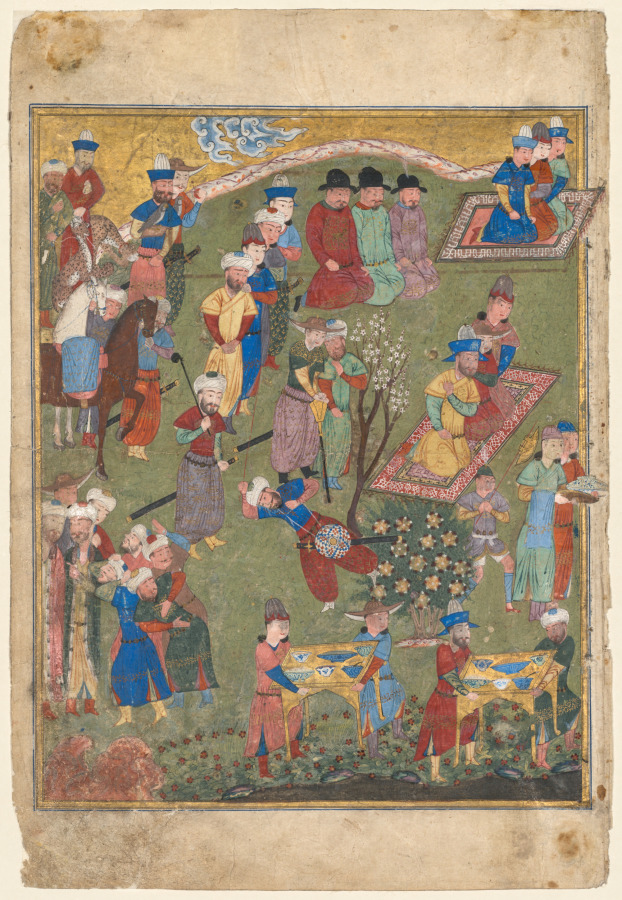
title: Royal Reception in a Landscape, left folio from the double frontispiece of a Shahnama (Book of Kings) of Firdausi (Persian, about 940–1019 or 1025)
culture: Iran, Shiraz, Timurid period (1370-1501)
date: 1444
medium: opaque watercolor, ink, gold and silver on paper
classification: Manuscript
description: The painting on the recto of this folio is the second half of a double-page frontispiece now detached from a Shahnama manuscript (see CMA 1945.169 for the first half of the frontispiece). The scene does not illustrate a narrative from the Shahnama, but likely represents the courtly audience for whose entertainment the manuscript was created. The date and style of the painting indicate that it was made during the reign of the Timurid dynasty in Shiraz, Iran.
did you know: From the upper left two trained cheetahs, a falcon, and horses are led into the scene.